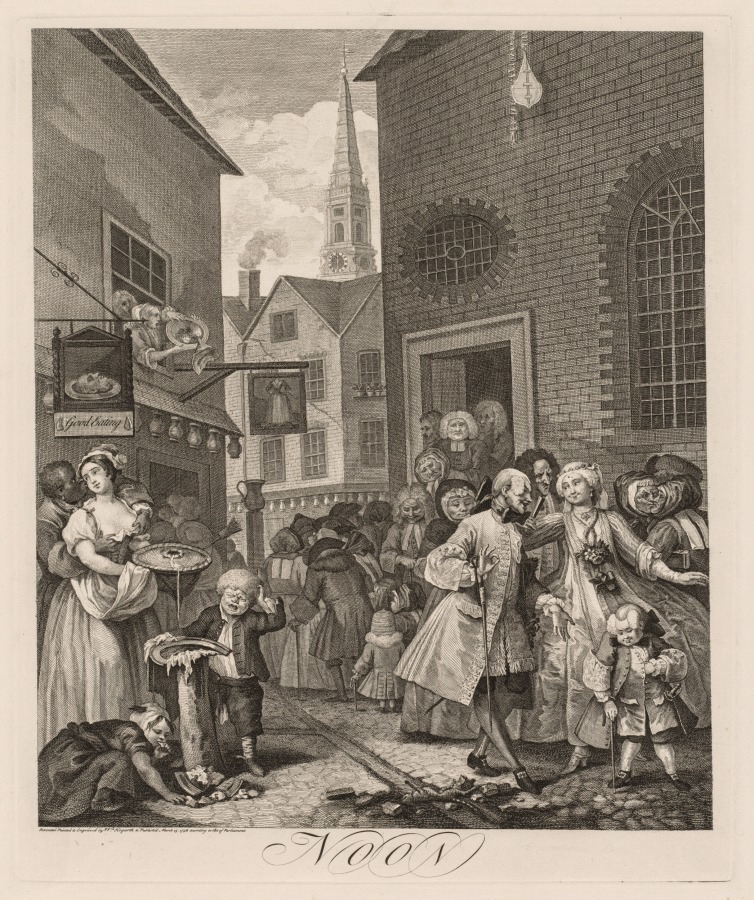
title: The Four Times of Day: Noon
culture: England, 18th century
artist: William Hogarth (British, 1697–1764)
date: 1738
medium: engraving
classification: Print